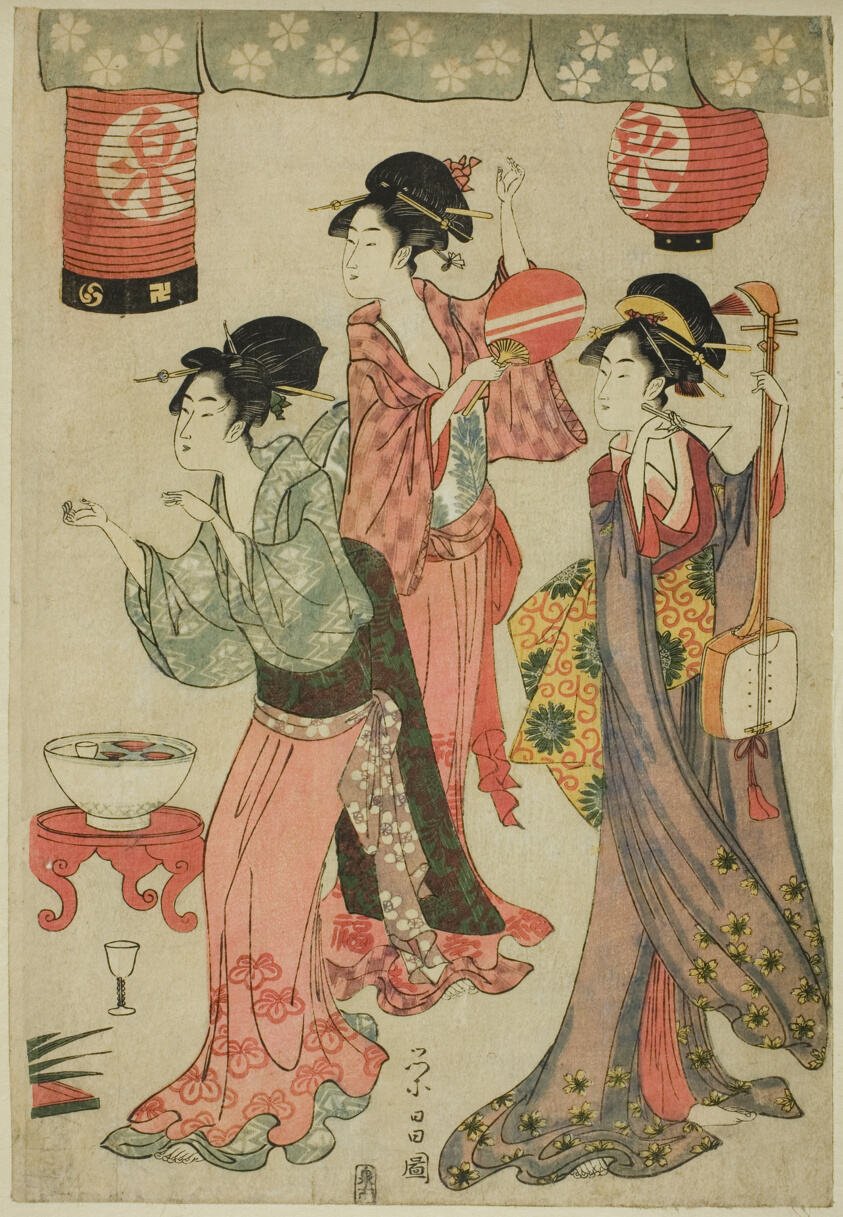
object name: Print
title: Festivity at a teahouse, from a parody of Chushingura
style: Japanese (culture or style)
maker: Chokosai Eisho (Japanese, active 1780-1800)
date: c. 1797/98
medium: Color woodblock print; right sheet of oban triptych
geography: Japan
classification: woodblock print; print; asian art